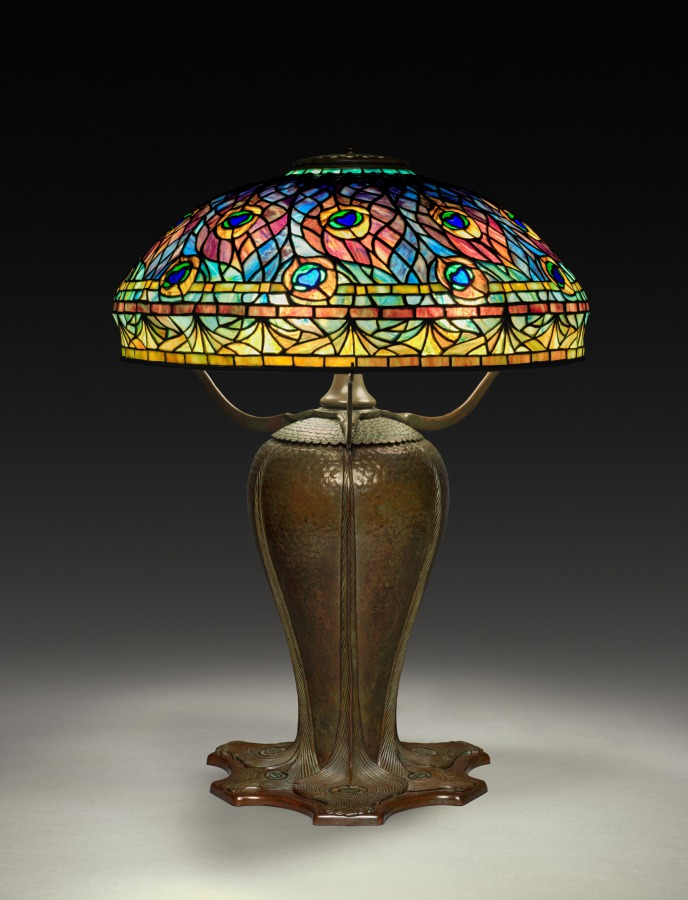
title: Peacock Table Lamp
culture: America, New York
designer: probably by Clara Wolcott Driscoll (American, 1861–1944)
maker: Tiffany Studios (United States, New York, 1902–32)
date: c. 1902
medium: Leaded glass, bronze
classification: Lamp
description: The peacock, with its brilliantly colored iridescent plumage, was a favorite motif of Louis Comfort Tiffany, appearing in almost every genre of his artistic production. The Peacock table lamp, created by Tiffany's chief lamp designer Clara Wolcott Driscoll, evokes the wide circular swath of a peacock's preening feathers and attracted critical acclaim to both Driscoll and Tiffany Studios. This particular version retains its original kerosene burning fluid apparatus as well as an electric bulb armature. Although incandescent lamp bulbs had become more widely available in the 1890s, most households, even those of the wealthy, were not yet wired for electricity. Tiffany originally designed his lamps with an oil-burning apparatus, consisting of a reservoir and a double wick and chimney, as well as an electric attachment. He cleverly predicted, though, that electric households would eventually become commonplace, so he soon moved to all-electric designs, greatly increasing the illumination and appeal of his lamps.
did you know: Originally designed to burn kerosene, this Peacock lamp still retains its original double wick and oil reservoir along with an adapter for electric light bulbs.